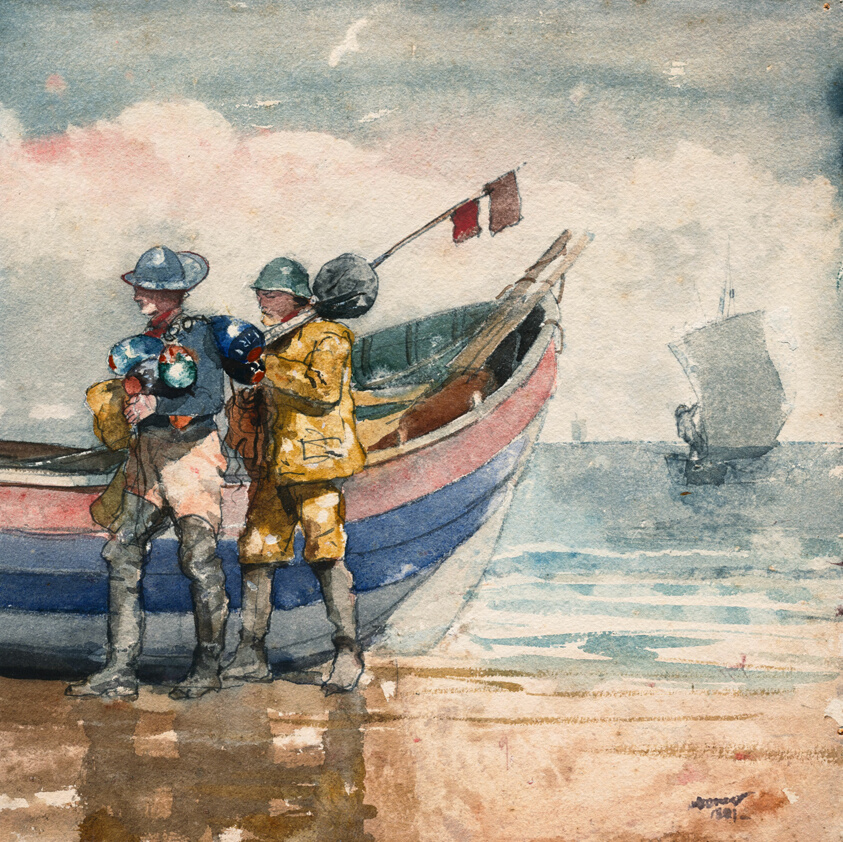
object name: Drawing and Watercolor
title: The Return, Tynemouth (recto) Study (verso)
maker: Winslow Homer (American, 1836-1910)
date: 1881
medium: Transparent watercolor, with touches of opaque watercolor, rewetting, blotting, and scraping, heightened with gum glaze, over graphite, on moderately thick, moderately-textured, ivory wove paper (left and lower edges trimmed)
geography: United States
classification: watercolor; drawings (visual works); prints and drawing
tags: boats, people, fishing